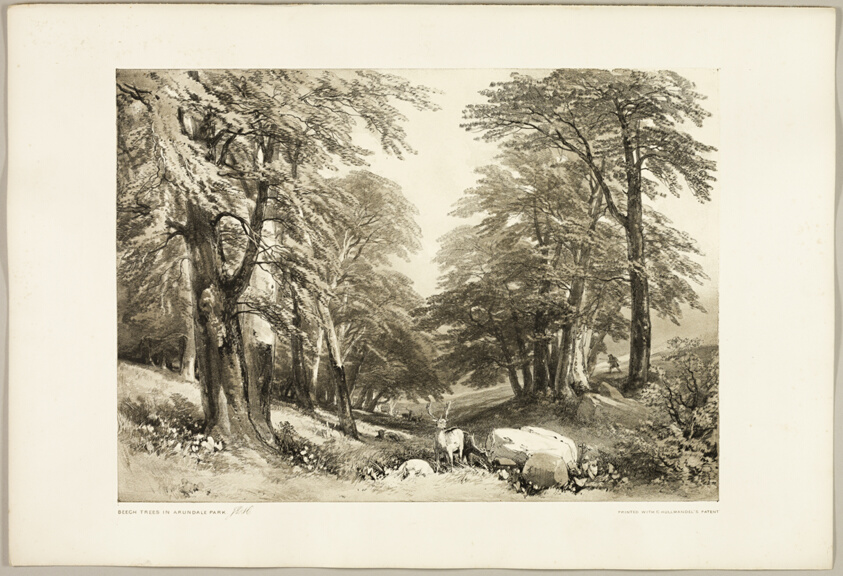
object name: Print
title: Beech Trees in Arundale Park, from The Park and the Forest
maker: James Duffield Harding (English, 1798-1863); printed by Charles Joseph Hullmandel (English, 1789–1850); published by Thomas McLean (English, 1788–1875)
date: 1841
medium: Lithograph in black, with brown tint from a second plate, on ivory wove paper, laid down on ivory wove paper (chine collé)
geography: England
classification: lithograph; print; prints and drawing